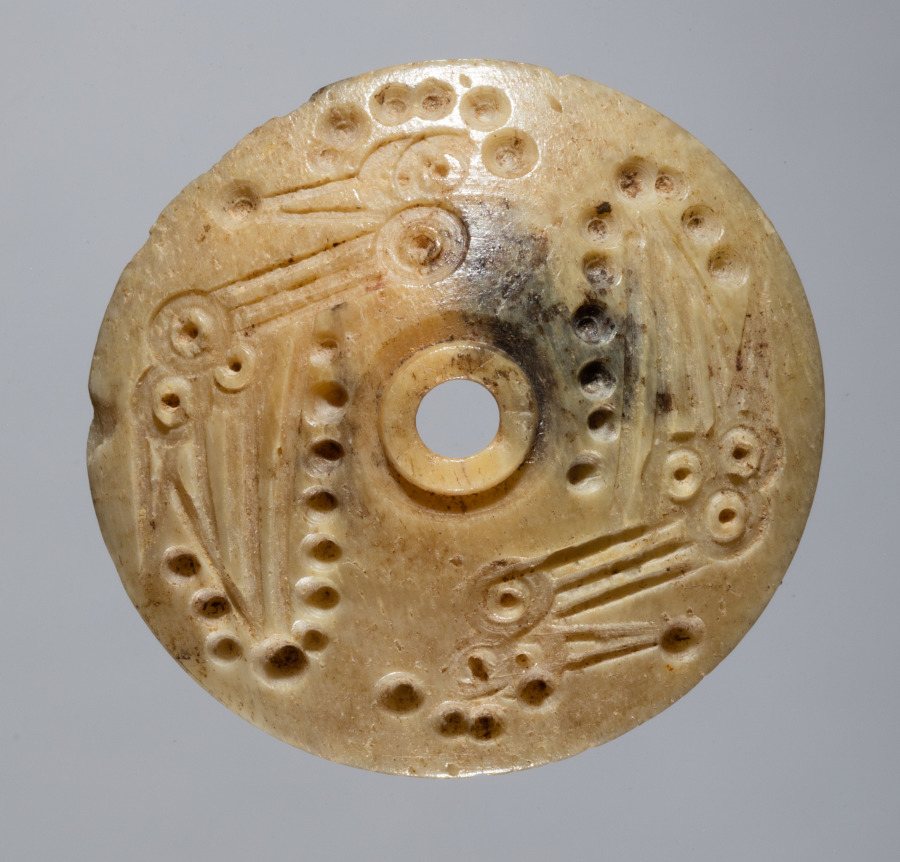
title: Spindle Whorl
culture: Iran, early Islamic period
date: 700s–900s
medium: bone, incised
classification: Spindle Whorl